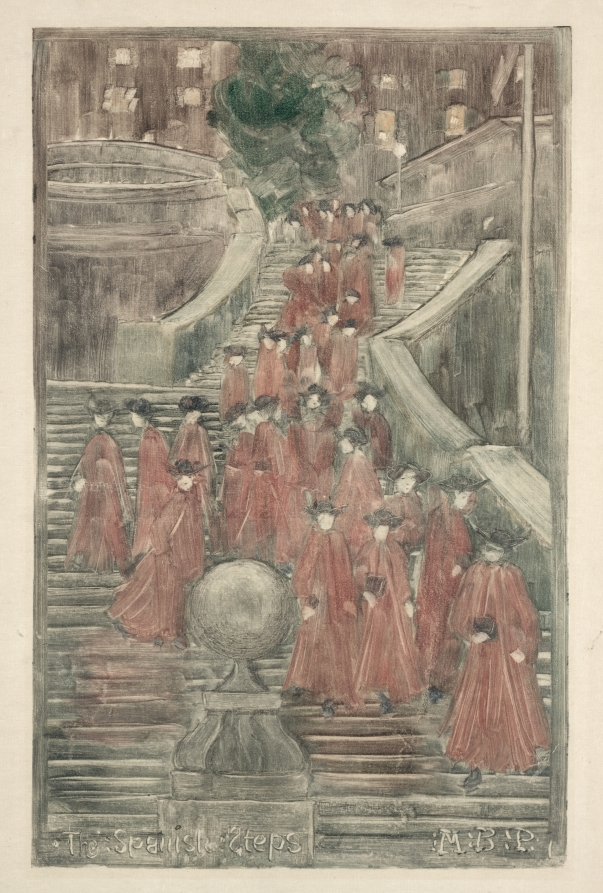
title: The Spanish Steps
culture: America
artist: Maurice Prendergast (American, born Newfoundland [now Canada], 1858–1924)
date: 1898–99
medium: color monotype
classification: Monotype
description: Executed during Prendergast's first trip to Italy, he selected a classic Roman tourist site, theatrical with its sweeping curves, and depicted three dozen red-robed Catholic seminarians flowing down the carefully delineated monumental staircase.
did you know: Maurice Prendergast became influenced by Impressionism after studying for two years in Paris during the 1880s.